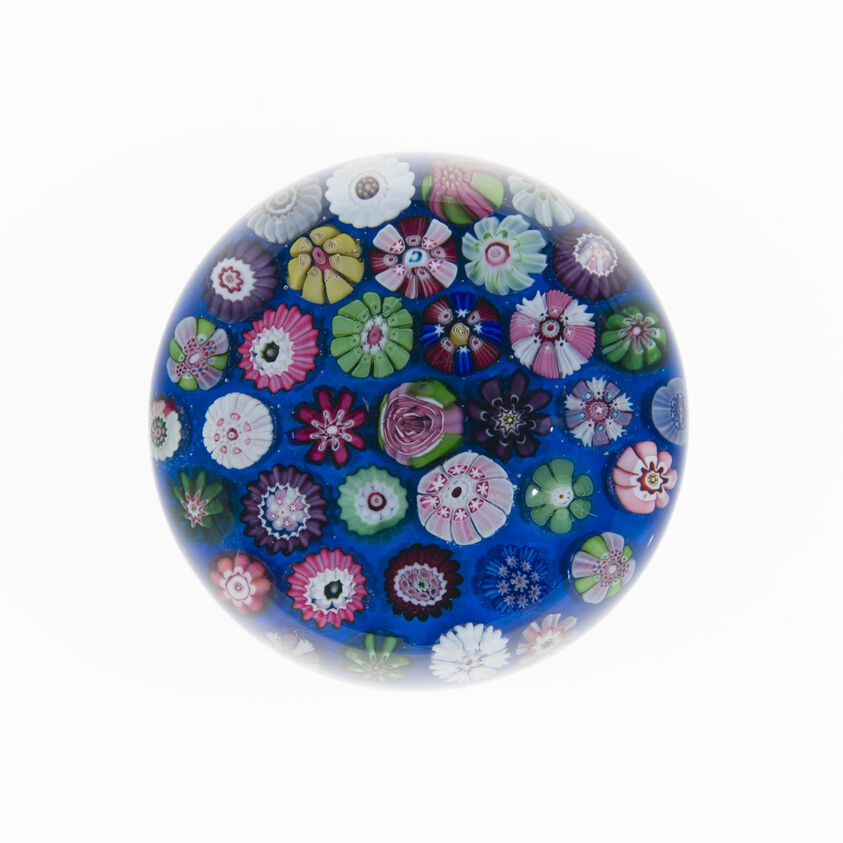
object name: Glass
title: Paperweight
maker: Clichy Glassworks (Cristalleries de Clichy); Clichy, France, 1837-1885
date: c. 1845/60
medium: Glass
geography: France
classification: paperweight; glass